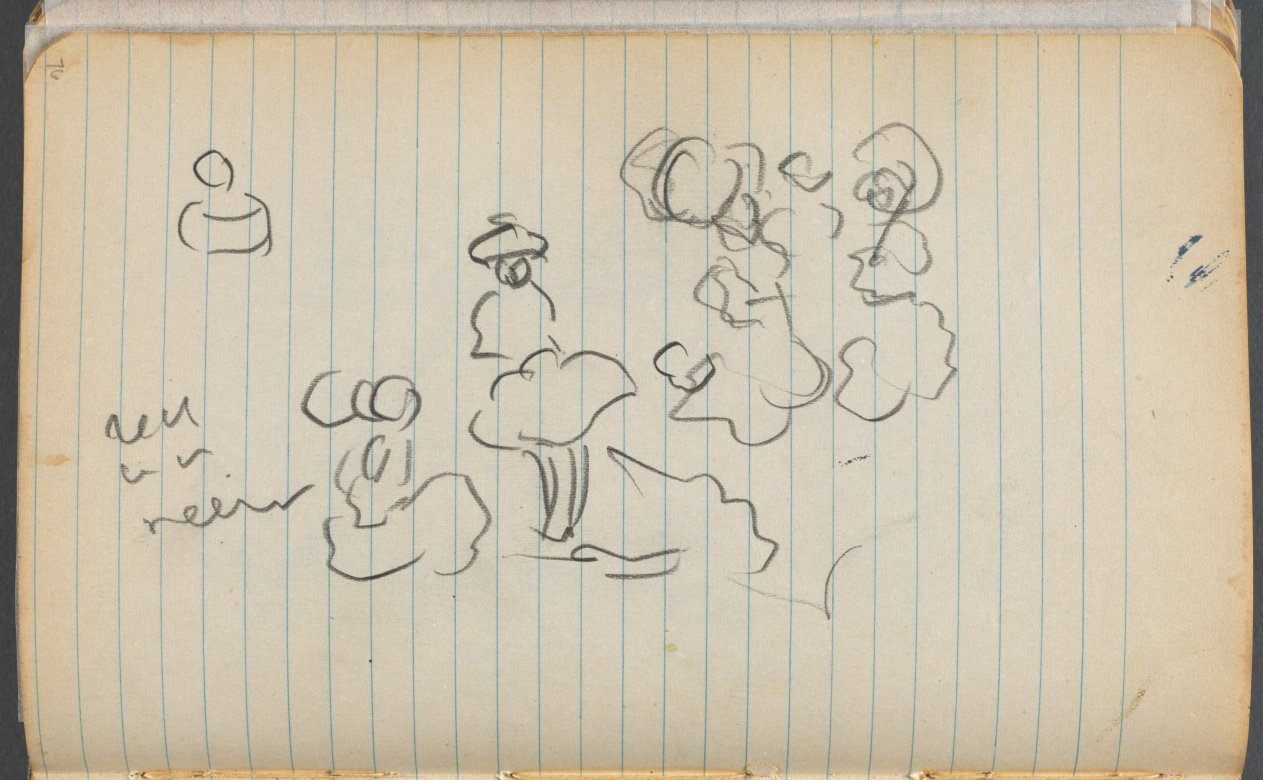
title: Sketchbook, page 076: Figures with Notes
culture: America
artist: Maurice Prendergast (American, born Newfoundland [now Canada], 1858–1924)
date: 1905–10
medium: graphite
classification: Bound Volume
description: This sketchbook contains 69 pages of drawings, a diary largely devoted to the state of the artist's health, and a three-page discourse on the nature of genius and ideas.